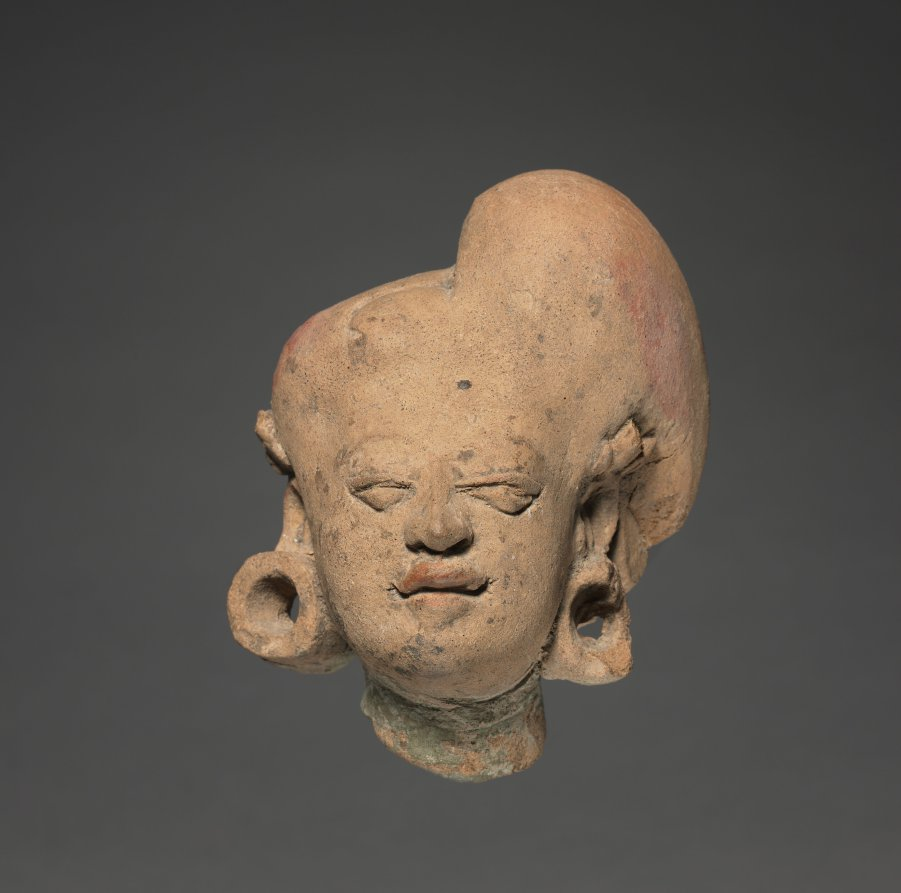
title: Female Head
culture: Eastern Java, Majapahit Dynasty (1293-1478)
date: Majapahit Dynasty (1293–1478)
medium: terracotta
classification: Sculpture